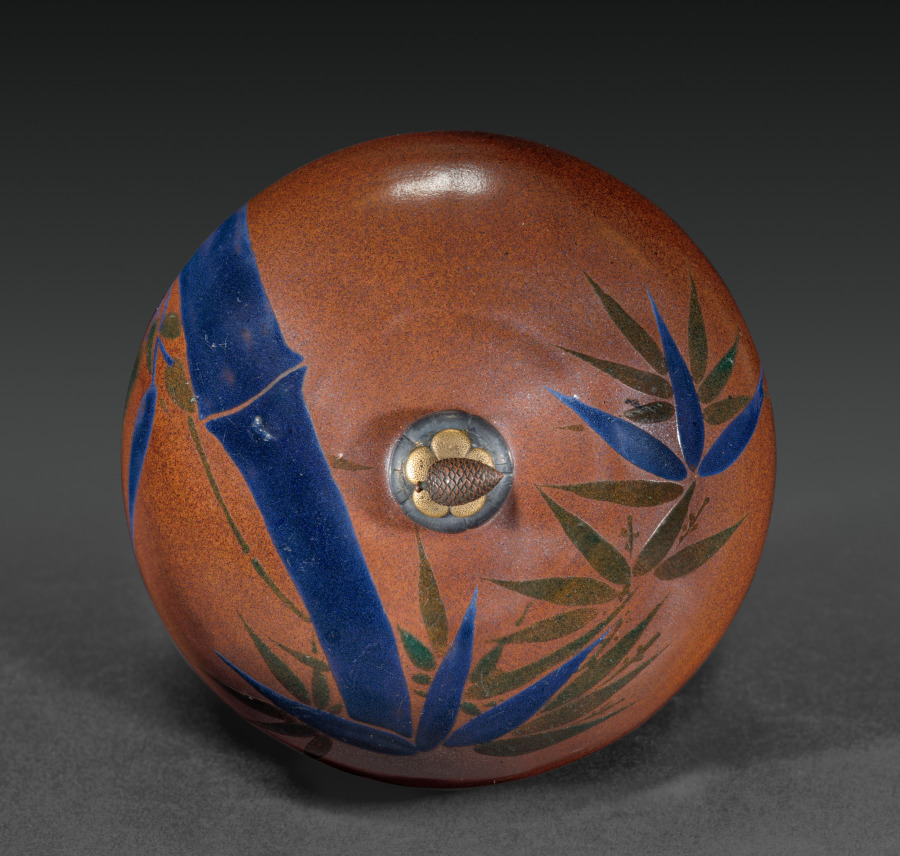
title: Jar with Stopple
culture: Japan, Edo period (1615–1868)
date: 1700s to mid-1800s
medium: stoneware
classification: Ceramic